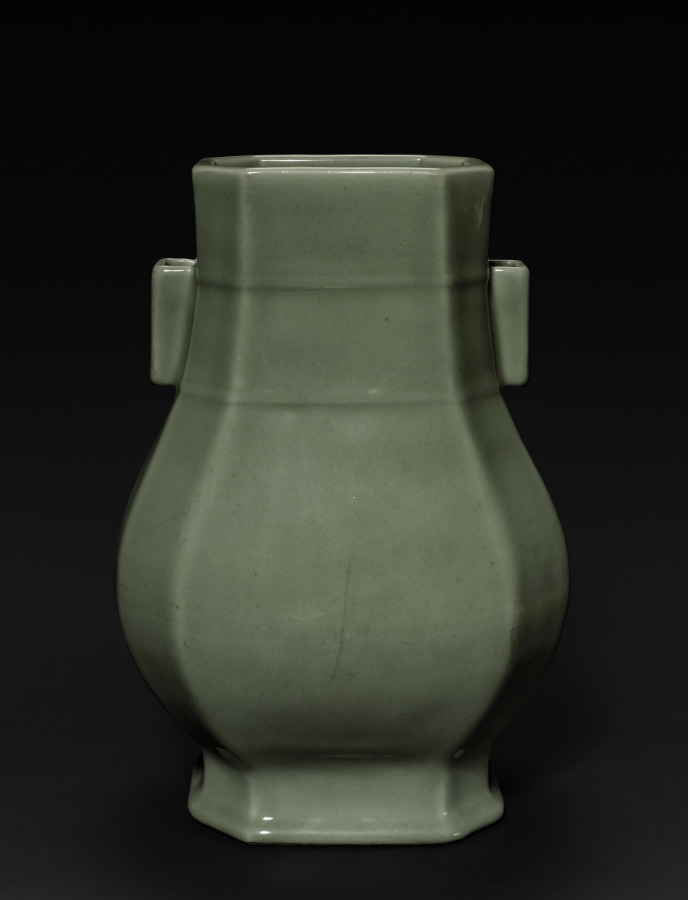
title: Suspension Vase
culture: China, Jiangxi Province, Jingdezhen kilns, Qing dynasty (1644–1911), Yongzheng mark and reign (1722–35)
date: 1723–35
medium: porcelain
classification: Ceramic